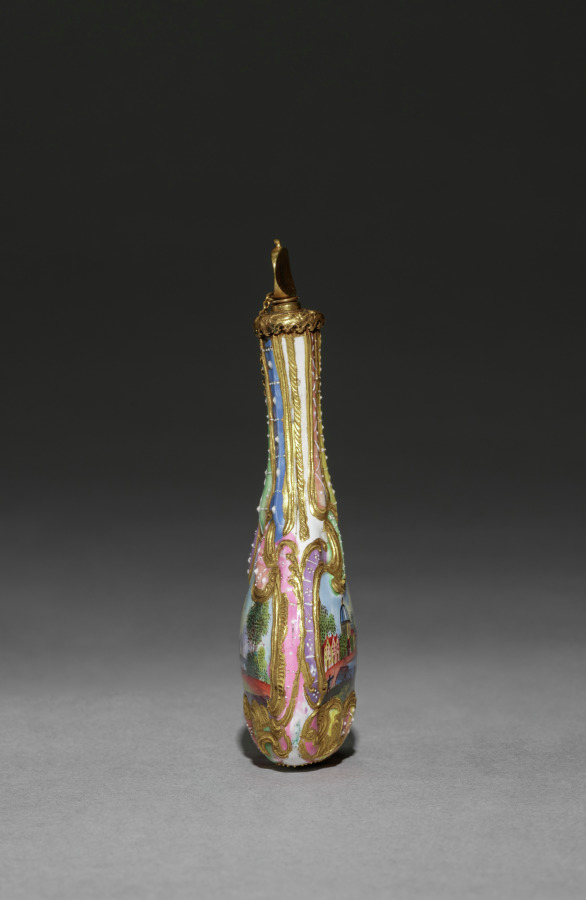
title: Scent Bottle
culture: England, Staffordshire, 18th century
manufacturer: Staffordshire Factory (British)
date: 1700s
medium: enamel on copper with metal mounts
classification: Miscellaneous